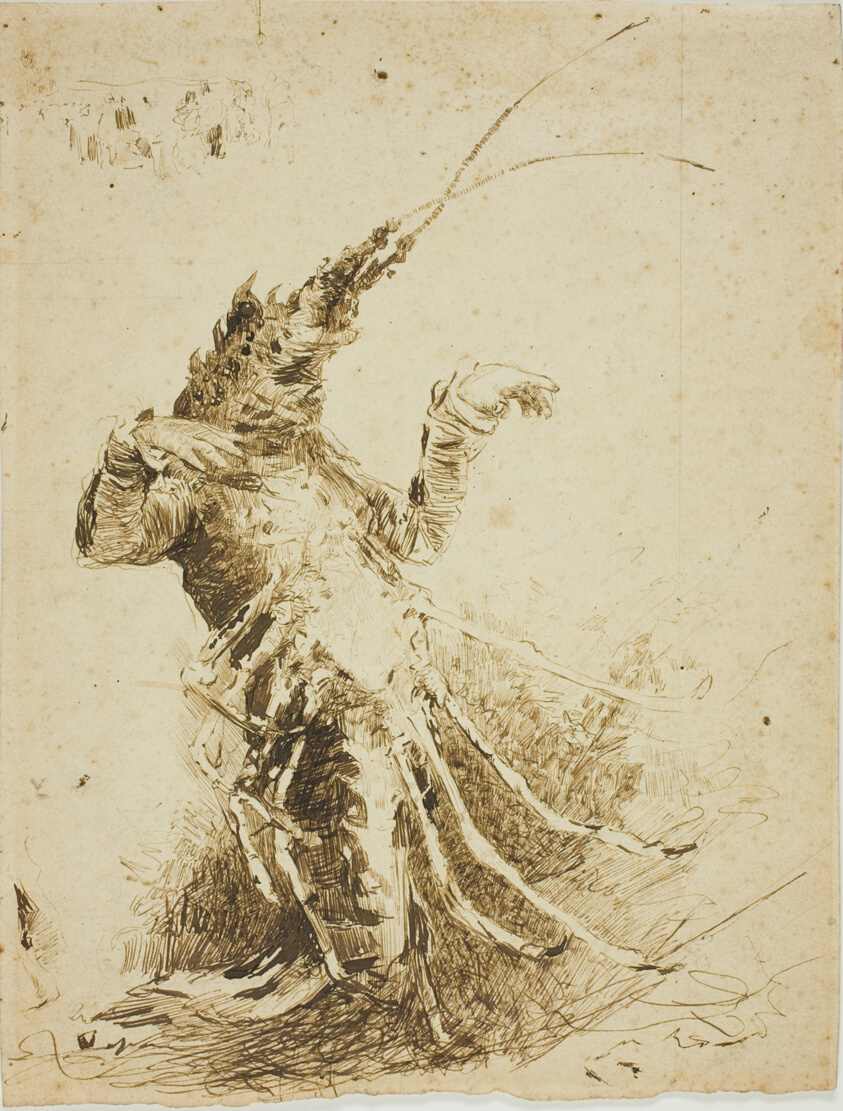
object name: Drawing and Watercolor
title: Shrimp-Man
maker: Unknown Artist; French, 19th century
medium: Pen and brown ink, with traces of graphite, on cream wove paper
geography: France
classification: pen and ink drawings; drawings (visual works); prints and drawing